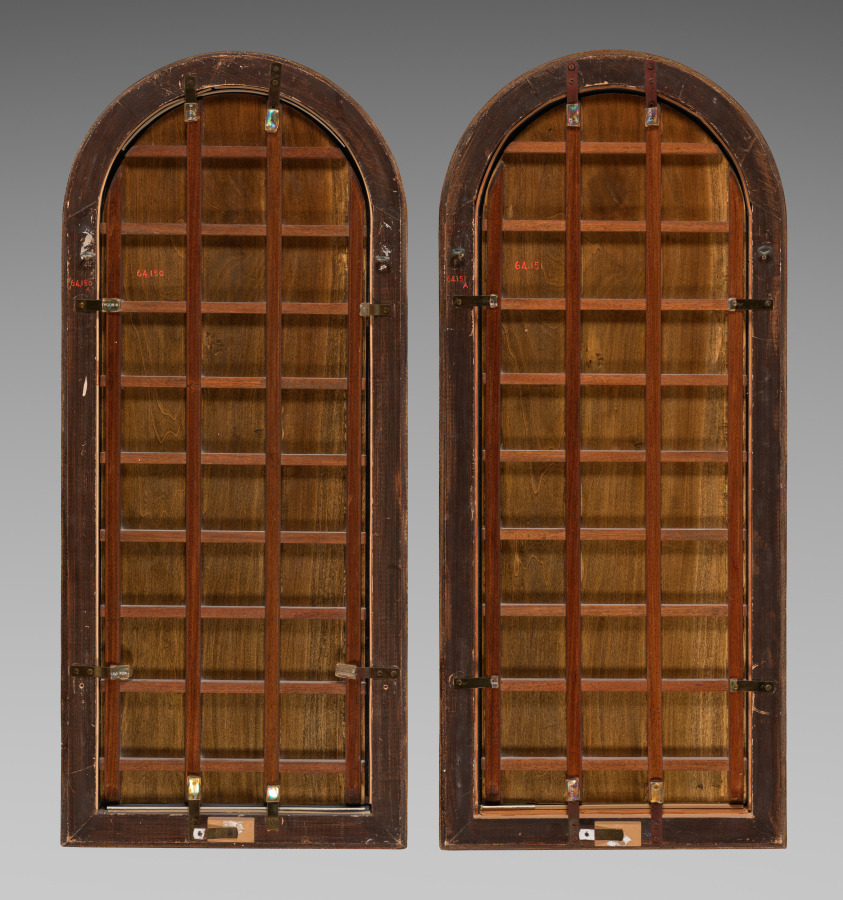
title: Pair of Panels from a Triptych: The Archangel Michael and St. Anthony Abbot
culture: Italy, Florence, 15th century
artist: Fra Filippo Lippi (Italian, c. 1406–1469)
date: 1458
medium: tempera on wood panel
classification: Painting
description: These panels depicting Saints Anthony the Abbot and Michael originally flanked a central scene of the Madonna and Child with Angels, now lost, to form a triptych. Giovanni di Cosimo de’ Medici of Florence commissioned the ensemble in 1457 as a diplomatic gift to Alfonso V of Aragon. Fra Filippo Lippi, a Carmelite friar and one of the great masters of early Renaissance Florence, depicted realistic, weighty figures in a three-dimensional space using a system of linear perspective, inspired partly by Masaccio’s Brancacci Chapel, and reflected in the background architecture. Saint Anthony the Abbot rejected all earthly possessions in pursuit of a contemplative life in the desert. He is generally regarded as the founder of monasticism and is depicted wearing a monk’s habit. Saint Michael’s sword, shield, and exquisitely bejeweled armor celebrate his role as heaven’s defender against evil.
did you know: Saint Michael's opulent appearance reflects the wealth and status of both the patron and the recipient of these paintings.